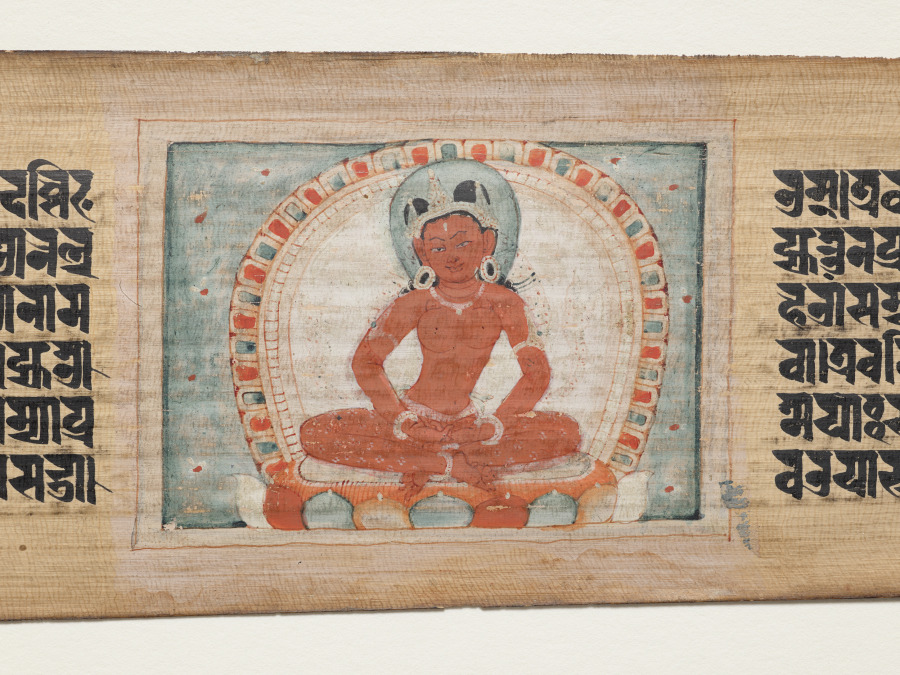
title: Three female figures, folio 89 (verso), from a Manuscript of the Perfection of Wisdom in Eight Thousand Lines (Ashtasahasrika Prajnaparamita-sutra)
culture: Eastern India, Bihar, Vikramashila Monastery. Painting: Nepal, Kathmandu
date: Sunday, September 14, 1119 (year 239 of the Newar Samvat in the month of Ashvina)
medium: gum tempera and ink on palm leaf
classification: Painting